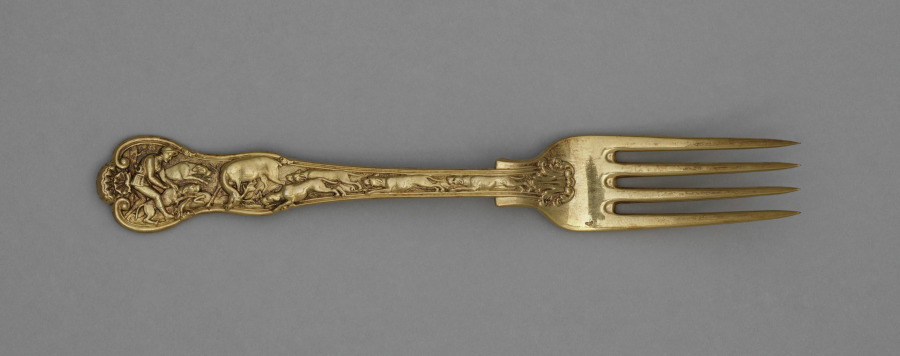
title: Dessert Fork with Hunt Scenes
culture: England, London, 19th century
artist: Paul Storr (British, 1771–1844)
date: c. 1822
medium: gilt silver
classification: Silver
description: Paul Storr was perhaps the most famous and successful English silversmith working in the early 19th century. This fork and spoon were originally part of a larger set. The exceptionally high quality of the metalworking and gilding of these pieces is typical of Storr's work.